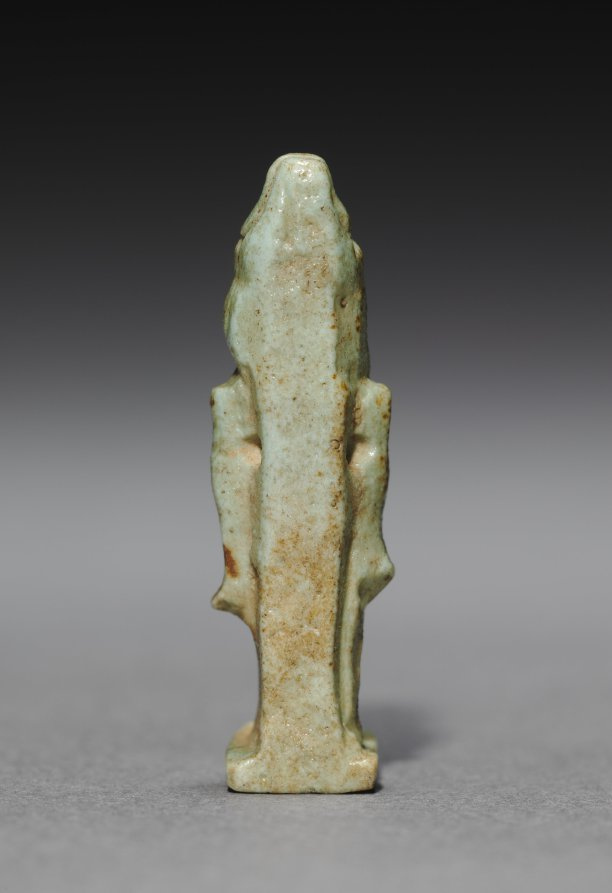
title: Amulet of Horus (?)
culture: Egypt, Late period (715–332 BCE), Dynasty 30–Greco-Roman period (332 BCE–395 CE), Ptolemaic dynasty (305–30 BCE)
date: 380–30 BCE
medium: gray green faience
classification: Amulets